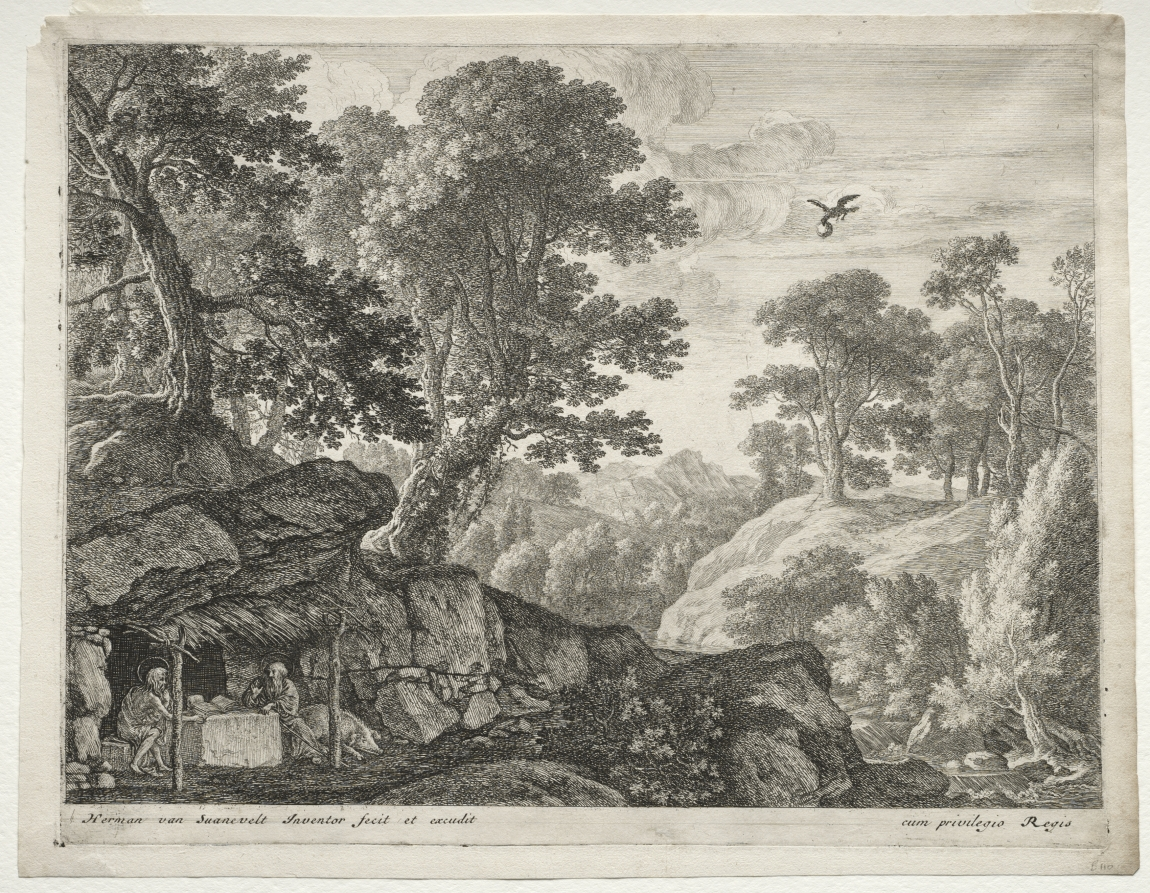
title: The Penitents: Landscape with Sts. Paul and Anthony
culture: Netherlands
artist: Herman van Swanevelt (Dutch, c. 1600–1655)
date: 1620–55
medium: etching and engraving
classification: Print